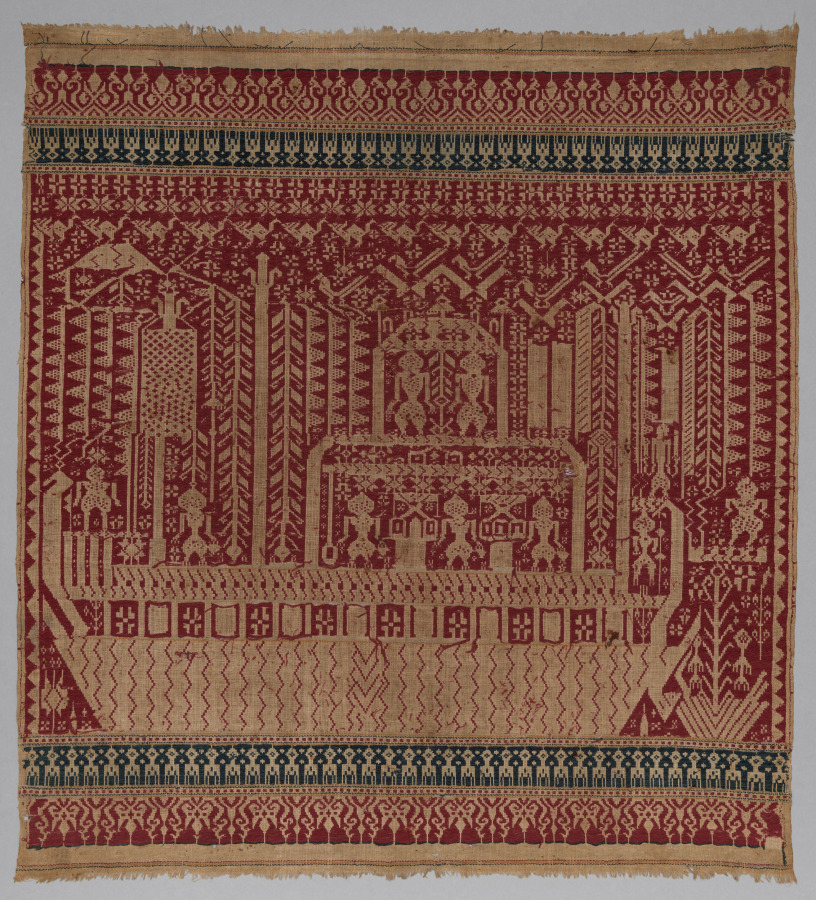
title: Tampan Pasisir (Ship Cloth)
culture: Indonesia, Sumatra, Lampung, 19th century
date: 1800s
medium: tabby weave with supplementary weft; cotton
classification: Textile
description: For several hundred years, until early in the present century, textiles of this type played an essential, symbolic role in virtually every southern Sumatran ritual. Since there is no written mythological literature in Indonesia, the exact meaning of the "tampan pasisir" (as this ritual cloth is called) remains unknown. Nevertheless, this fine weaving must be a kind of narrative. Ships, of course, were essential to the life of these island people, and using one as an image for safe passage from one of life's stages to another seems plausible. This rare piece--few textiles of its age and condition from the tropical climes of Indonesia survive--was a most welcome gift to The Cleveland Museum of Art from the Textile Arts Club in honor of its 50th anniversary.